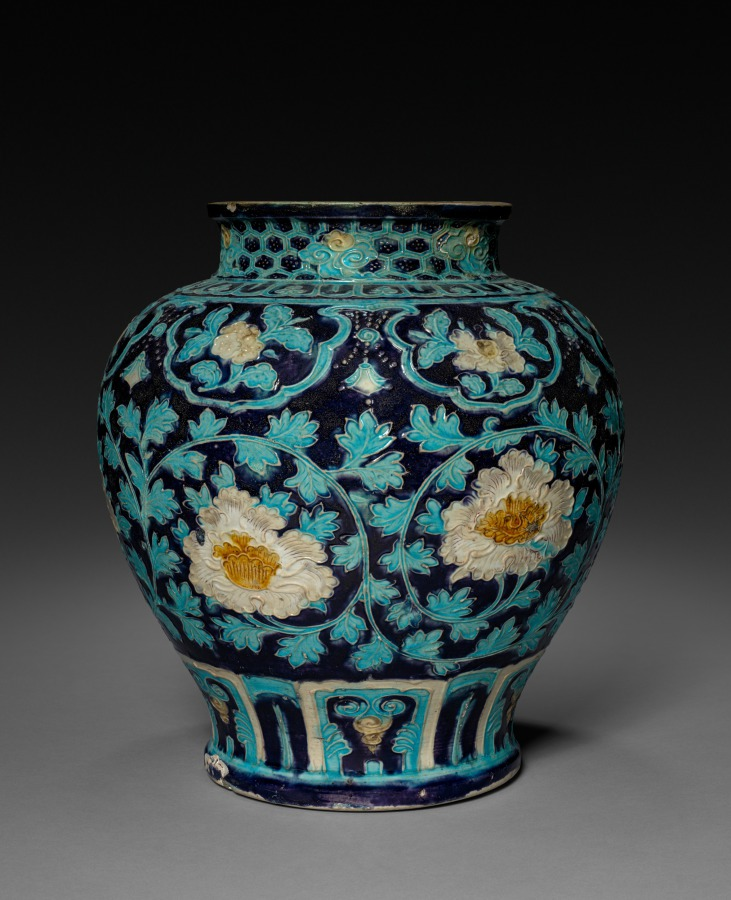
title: Jar with Chrysanthemum Decoration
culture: China, Ming dynasty (1368–1644)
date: 1368–1644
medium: porcelain, Fahua ware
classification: Ceramic